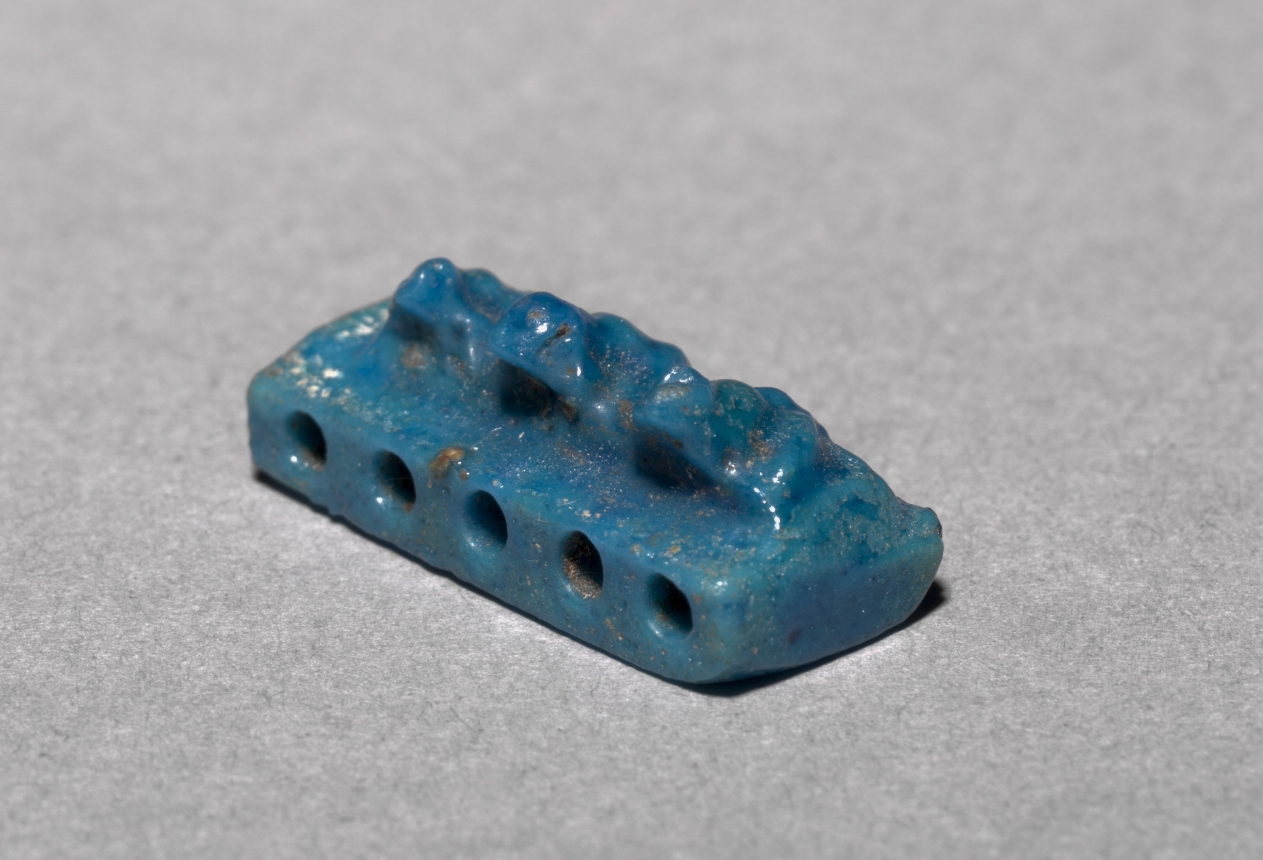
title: Three-Frog Bead Amulet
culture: Egypt, New Kingdom (1540–1069 BCE)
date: 1540–1069 BCE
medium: deep turquoise faience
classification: Amulets